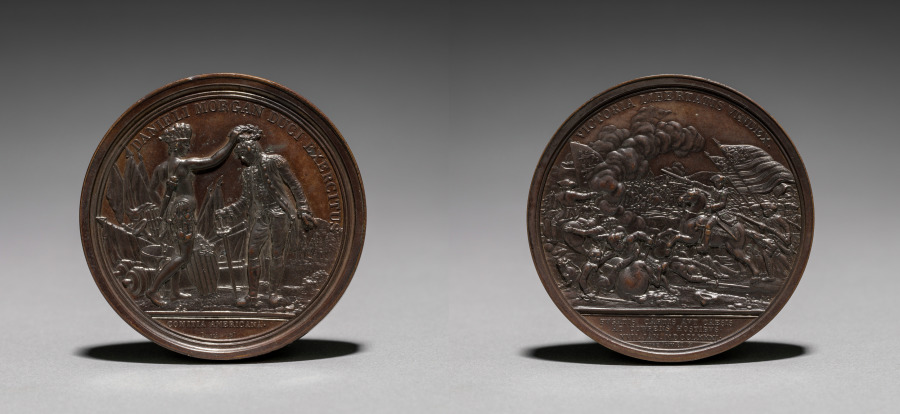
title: Medal: Daniel Morgan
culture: France, 19th century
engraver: Augustin Dupré (French, 1748–1833)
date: c.1770–1800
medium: bronze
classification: Metalwork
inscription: Danieli Morgan duci exercitus. Comitia Americana.